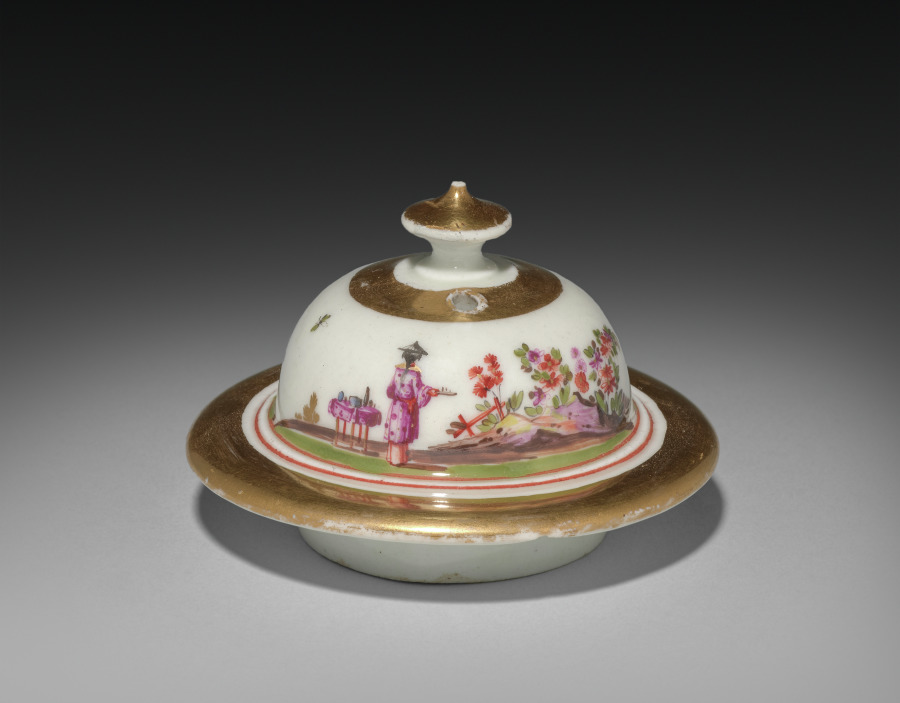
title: Tea Pot (lid)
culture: Germany, Meissen, 18th century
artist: Meissen Porcelain Factory (German, est. c. 1710)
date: c. 1723–24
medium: gilt porcelain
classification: Ceramic